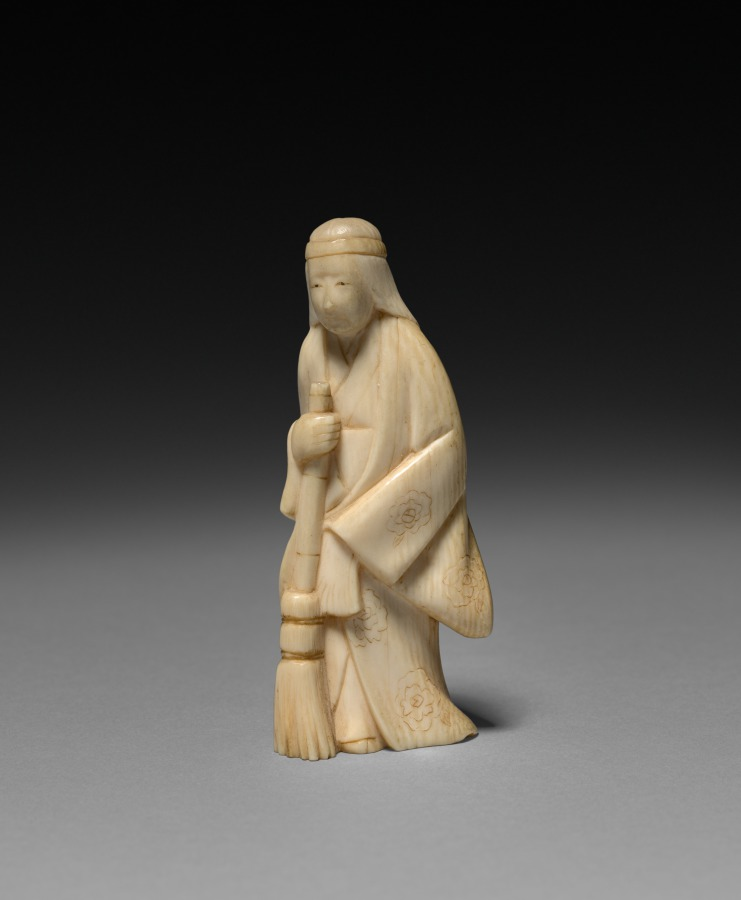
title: Woman with Broom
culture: Japan, Meiji period (1868–1912)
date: early 1900s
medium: ivory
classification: Ivory